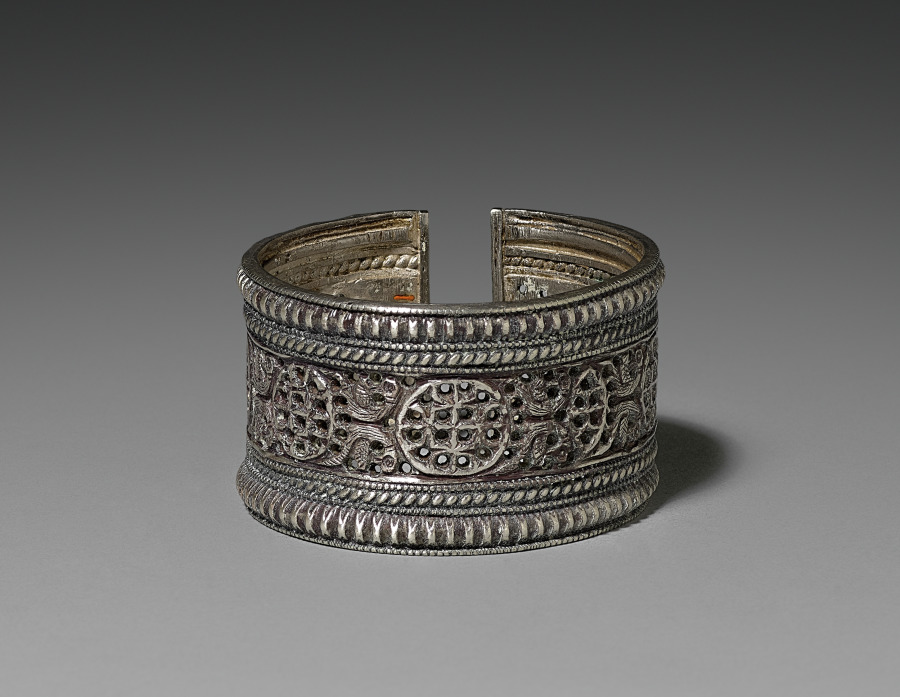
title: Bracelet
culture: India, Lahore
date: 1800s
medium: silver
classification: Jewelry